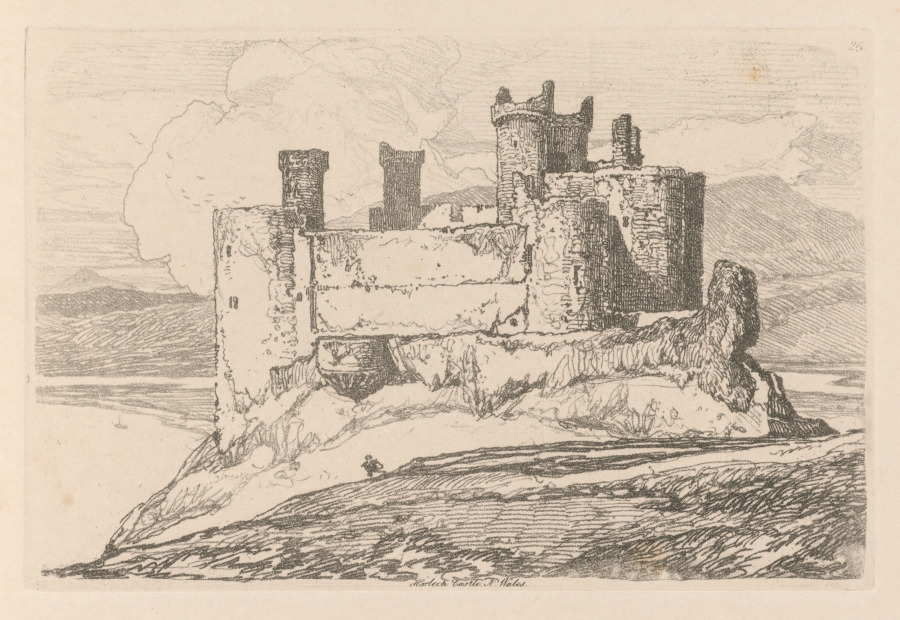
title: Liber Studiorum: Plate 25, Harlech Castle, N. Wales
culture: England, 19th century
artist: John Sell Cotman (British, 1782–1842)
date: 1838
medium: softground etching, from a bound volume containing 48 plates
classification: Bound Volume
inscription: In plate, within image, upper right: 25; in plate, below image: Harlech Castle, N. Wales